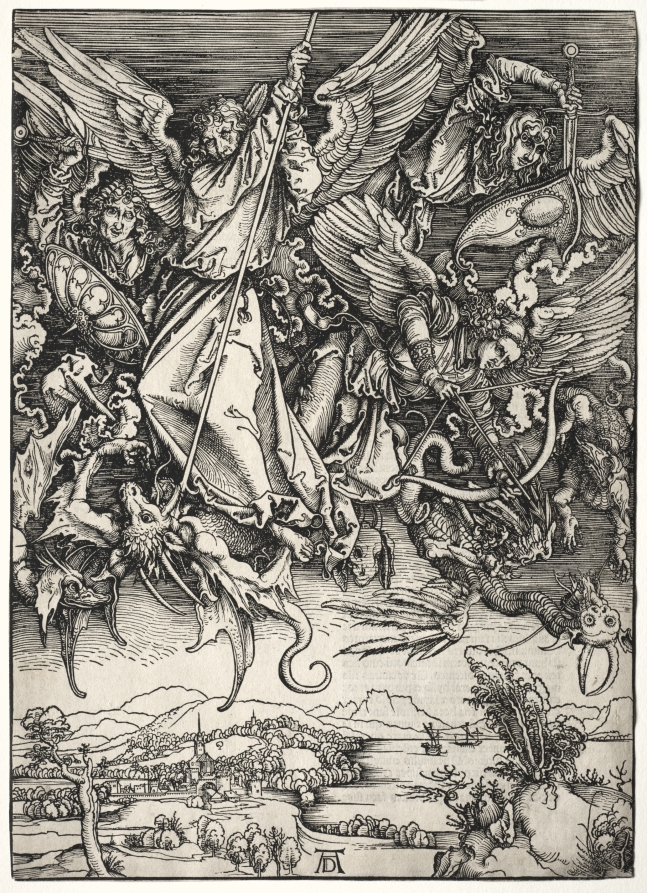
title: Revelation of St. John: St. Michael fighting the Dragon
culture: Germany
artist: Albrecht Dürer (German, 1471–1528)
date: 1511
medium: woodcut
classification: Print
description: This woodcut comes from a series of 15 scenes from the Apocalypse. Dürer drew upon late northern Gothic traditions infused with the reality of spiritual events, biblical interpretation, and dense composition, as well as careful attention to naturalistic details of flora and fauna. He interprets Saint John’s visions by giving them a convincing physical existence. This scene depicts the war in heaven, a final battle between good and evil. Saint Michael and his angels defeat the dragon (Satan) and the other fallen angels, now morphed into repulsive demons, casting them into hell.